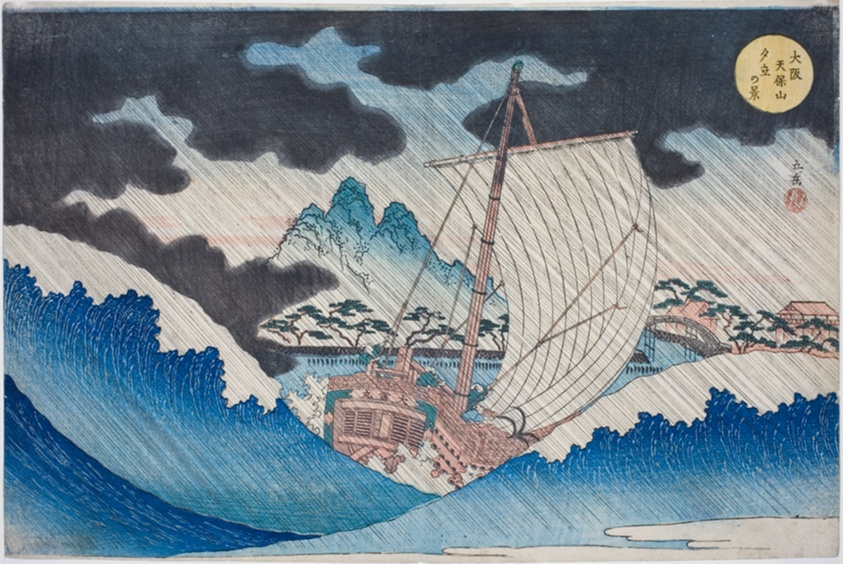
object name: Print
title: View of an Afternoon Downpour at Mount Tenpo in Osaka (Osaka Tenpozan yudachi no kei), from the series "Famous Places in Osaka: Fine Views of Mount Tenpo (Naniwa meisho Tenpozan shokei ichiran)"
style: Japanese (culture or style)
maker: Yashima Gakutei (Japanese, 1786 (?)-1868)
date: c. 1834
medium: Color woodblock print; oban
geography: Japan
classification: woodblock print; print; asian art